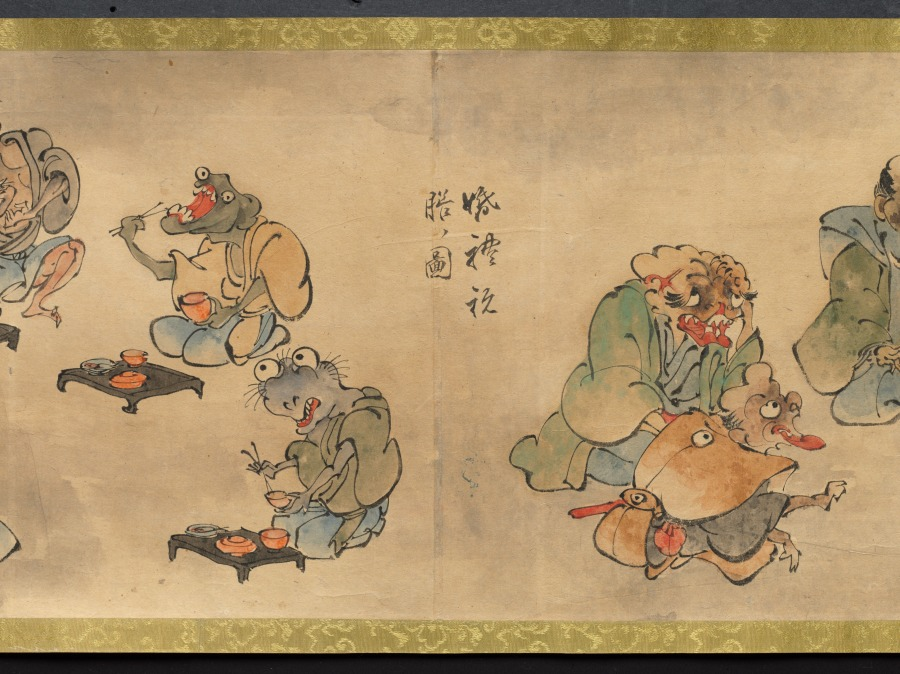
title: An Illustrated Marriage of Apparitions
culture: Japan, Edo period (1615–1868)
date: mid-1800s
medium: handscroll; ink and color on paper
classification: Painting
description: The matchmaking, engagement, wedding, and birth of the first child of two apparitions, or bakemono, literally "things that change," are illustrated in this whimsical, humorous handscroll. Japanese folklore abounds with such strange creatures, most famously represented in handscrolls featuring a procession of 100 supernatural monsters. Aside from a textual preface and cartouches indicating the content of the scenes, the tale is told visually. The artist and whereabouts of the original handscroll are unknown, but a number of other 19th-century copies by amateur painters exist in Japanese collections, attesting to its broad appeal.